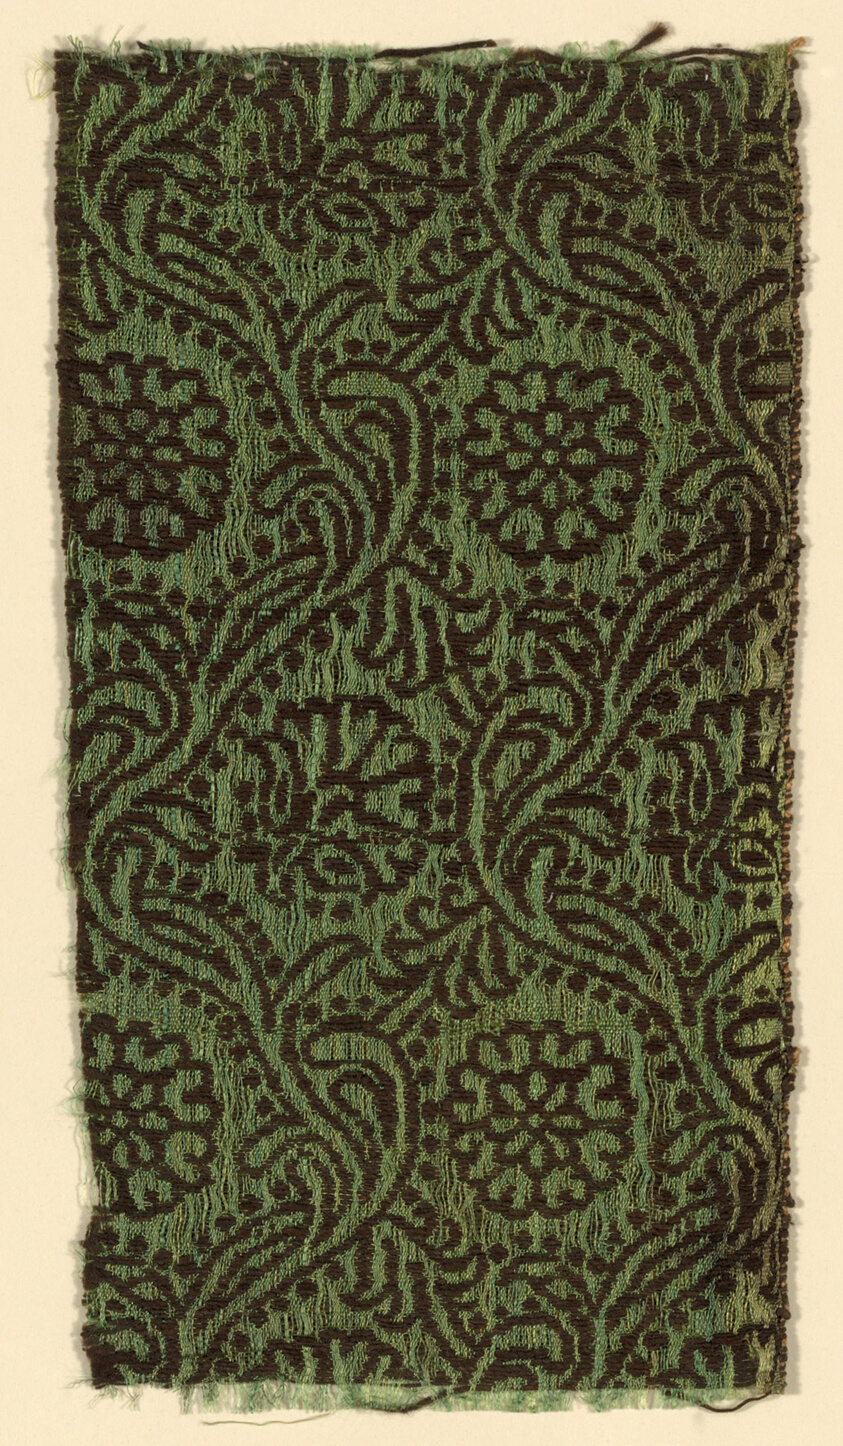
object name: Textile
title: Fragment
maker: Europe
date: 1650/1700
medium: Silk and cotton, plain weave with supplementary patterning wefts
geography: Europe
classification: textile; weaving